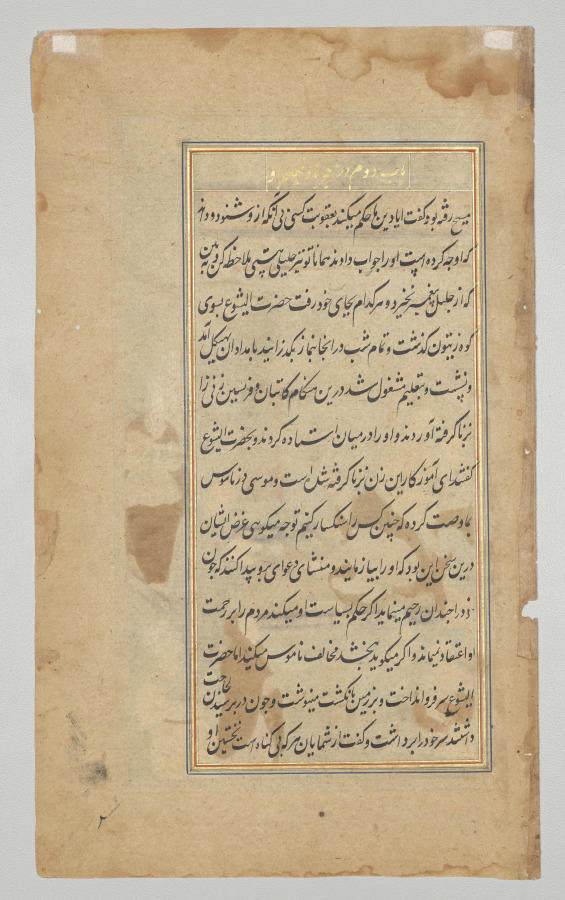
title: Jesus writes on the ground (folio 130 verso), from a Mirror of Holiness (Mir’at al-quds) of Father Jerome Xavier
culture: Mughal India, Allahabad, made for Prince Salim (1569–1627)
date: 1602–4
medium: Gum tempera, ink, color, and gold on paper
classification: Manuscript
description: As Jesus was debating with the scribes and Pharisees in Jerusalem, they brought before him an adulterous woman. Hoping to incite him to violence, they declared that if Jesus followed the law of Moses, he should order her to be stoned to death. Jesus responded, “Let whichever of you is without sin cast the first stone.” Then he began to write with his finger on the ground, and each of the men saw a description of his own sins. The two men in the bottom corner of the painting clutch stones with expressions of doubt, fear, and disgust. The adulteress in the red dress holds out her hands in supplication.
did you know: The adulteress wears a red dress, gold rings, and a necklace under her stole.